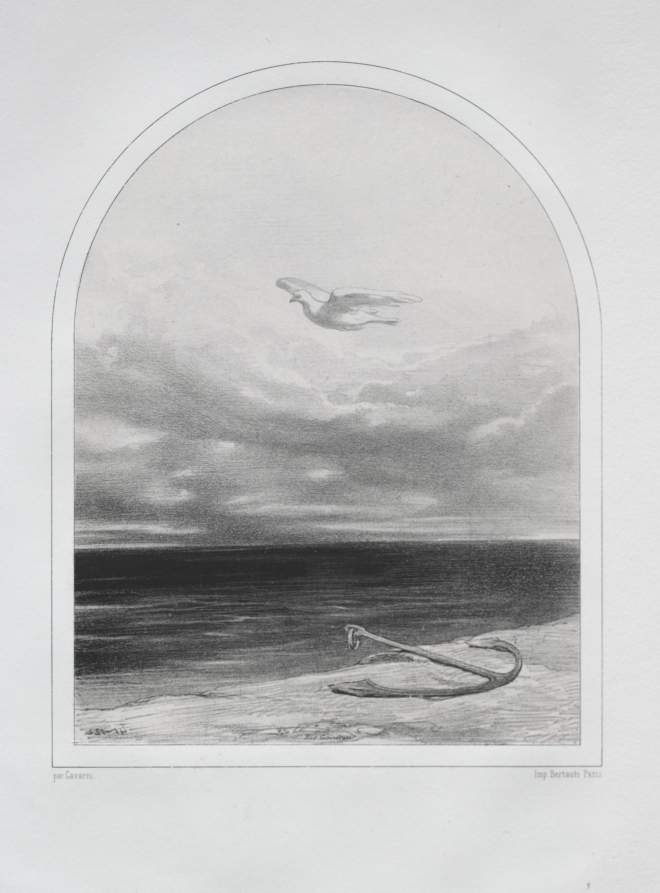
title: The White Dove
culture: France, 19th century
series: Lilies and Roses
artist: Paul Gavarni (French, 1804–1866)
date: c. 1842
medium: lithograph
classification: Print